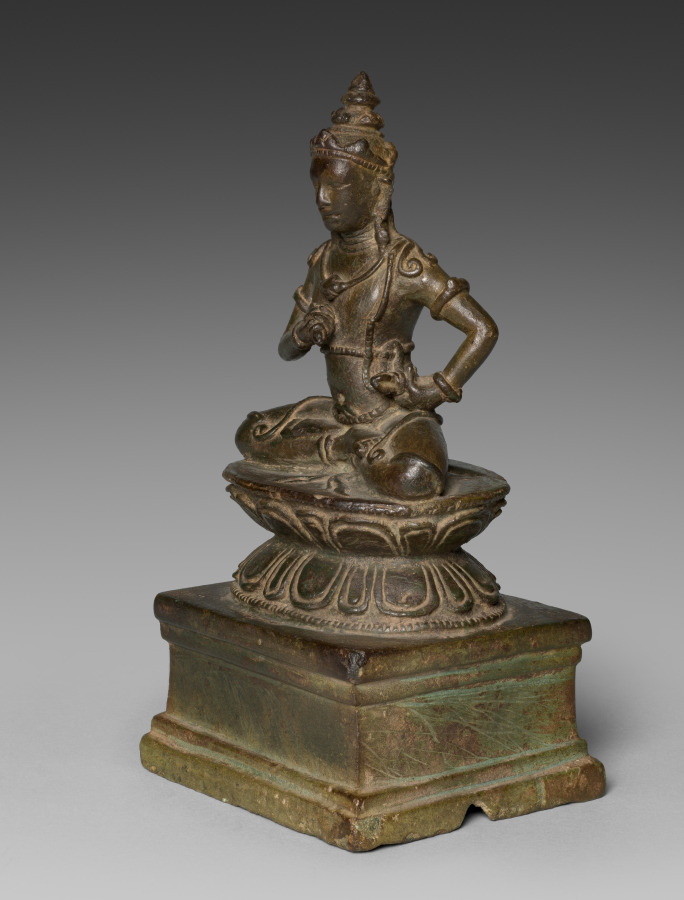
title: Vajrasattva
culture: Cambodia, style of Angkor Thom, 12th-13th century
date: 1100s–1200s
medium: bronze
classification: Sculpture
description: Vajrasattva is a Buddhist being of enlightenment who holds the vajra, or thunderbolt, in his right hand and a bell in his left. The vajra and bell are the basic implements used in tantric rituals that were popular under Jayavarman VII and practiced at Banteay Chhmar. Tantra is a form of Buddhism that makes use of rituals and mantras to aid practitioners in reaching their goals quickly, as though with the speed of lightning. Tantric texts and rituals were used frequently in Cambodia, from the 900s onward, but they were especially prominent under Jayavarman VII. This form of Buddhism appears to have been supplanted by other forms after the 1400s. Small bronze images of Vajrasattva may have been brought out from a temple treasury during the performance of Buddhist rituals that followed the instructions in a Sanskrit text, brought to Cambodia from India, called the Hevajra-tantra. In that text Vajrasattva manifests at key moments in the rituals.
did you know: From the back of the crown hang cords, which drape over the shoulders. The same type of cords hang from the back of the belt, coiling over the legs symmetrically on either side.